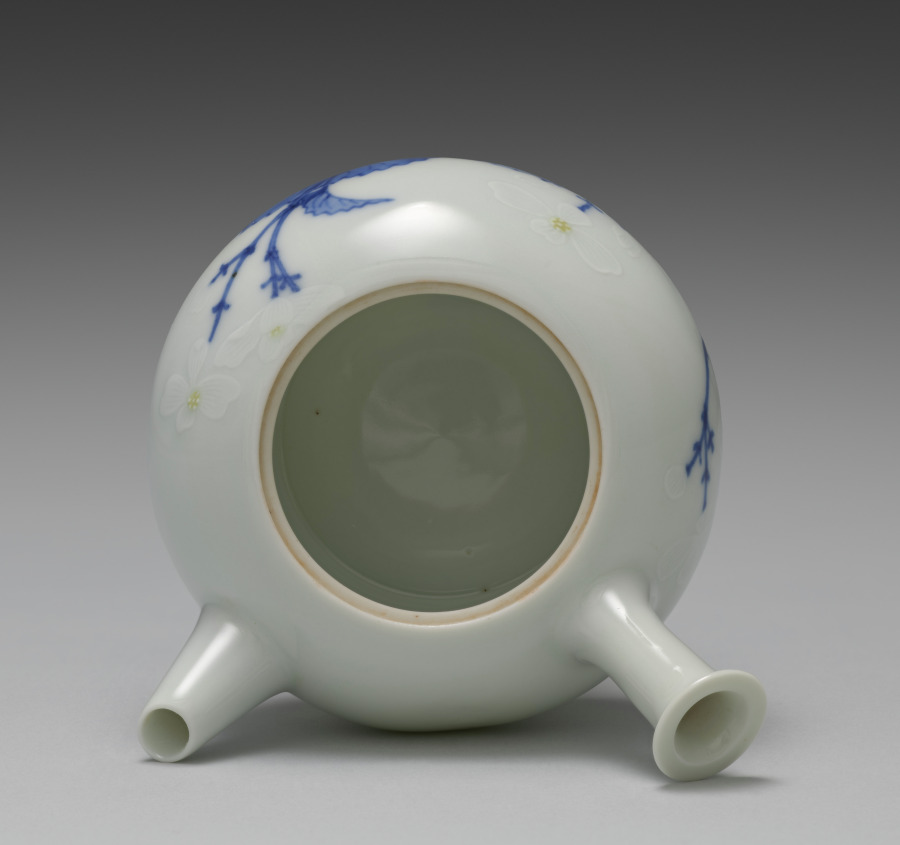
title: Teapot with Begonias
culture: Japan, Meiji period (1868–1912)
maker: Seifū Yohei III (Japanese, 1851–1914)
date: 1897–1914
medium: Porcelain with underglaze and overglaze colors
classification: Ceramic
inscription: 清風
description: This teapot has complex surface treatment: a design of begonias in modulated underglaze blue for the leaves and stems as well as thick overglaze white with incised lines to define the petals, plus small areas of underglaze yellow at their low-relief centers. A band of underglaze blue gives further definition to the lid’s handle, and the area just above the base has a double band of blue above a row of snail-shell curls. Unlike many other teapots, which have marks on their bases, this one has “Seifu” incised into one of its sides in relatively large characters. It is the side that would face the host if the teapot were held by the handle with the right hand, which would be the expectation.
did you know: This teapot with begonias combines underglaze blue with subtle use of yellow and white enamels.